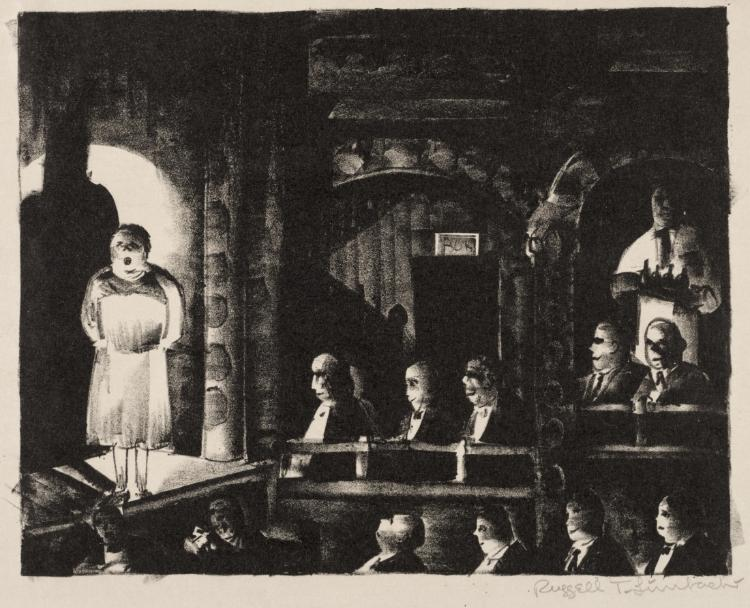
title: The Blues Singer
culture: America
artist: Russell T. Limbach (American, 1904–1971)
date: c. 1928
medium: lithograph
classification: Print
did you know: The singer in this image resembles Bessie Smith, the famous blues singer of the 1920s.